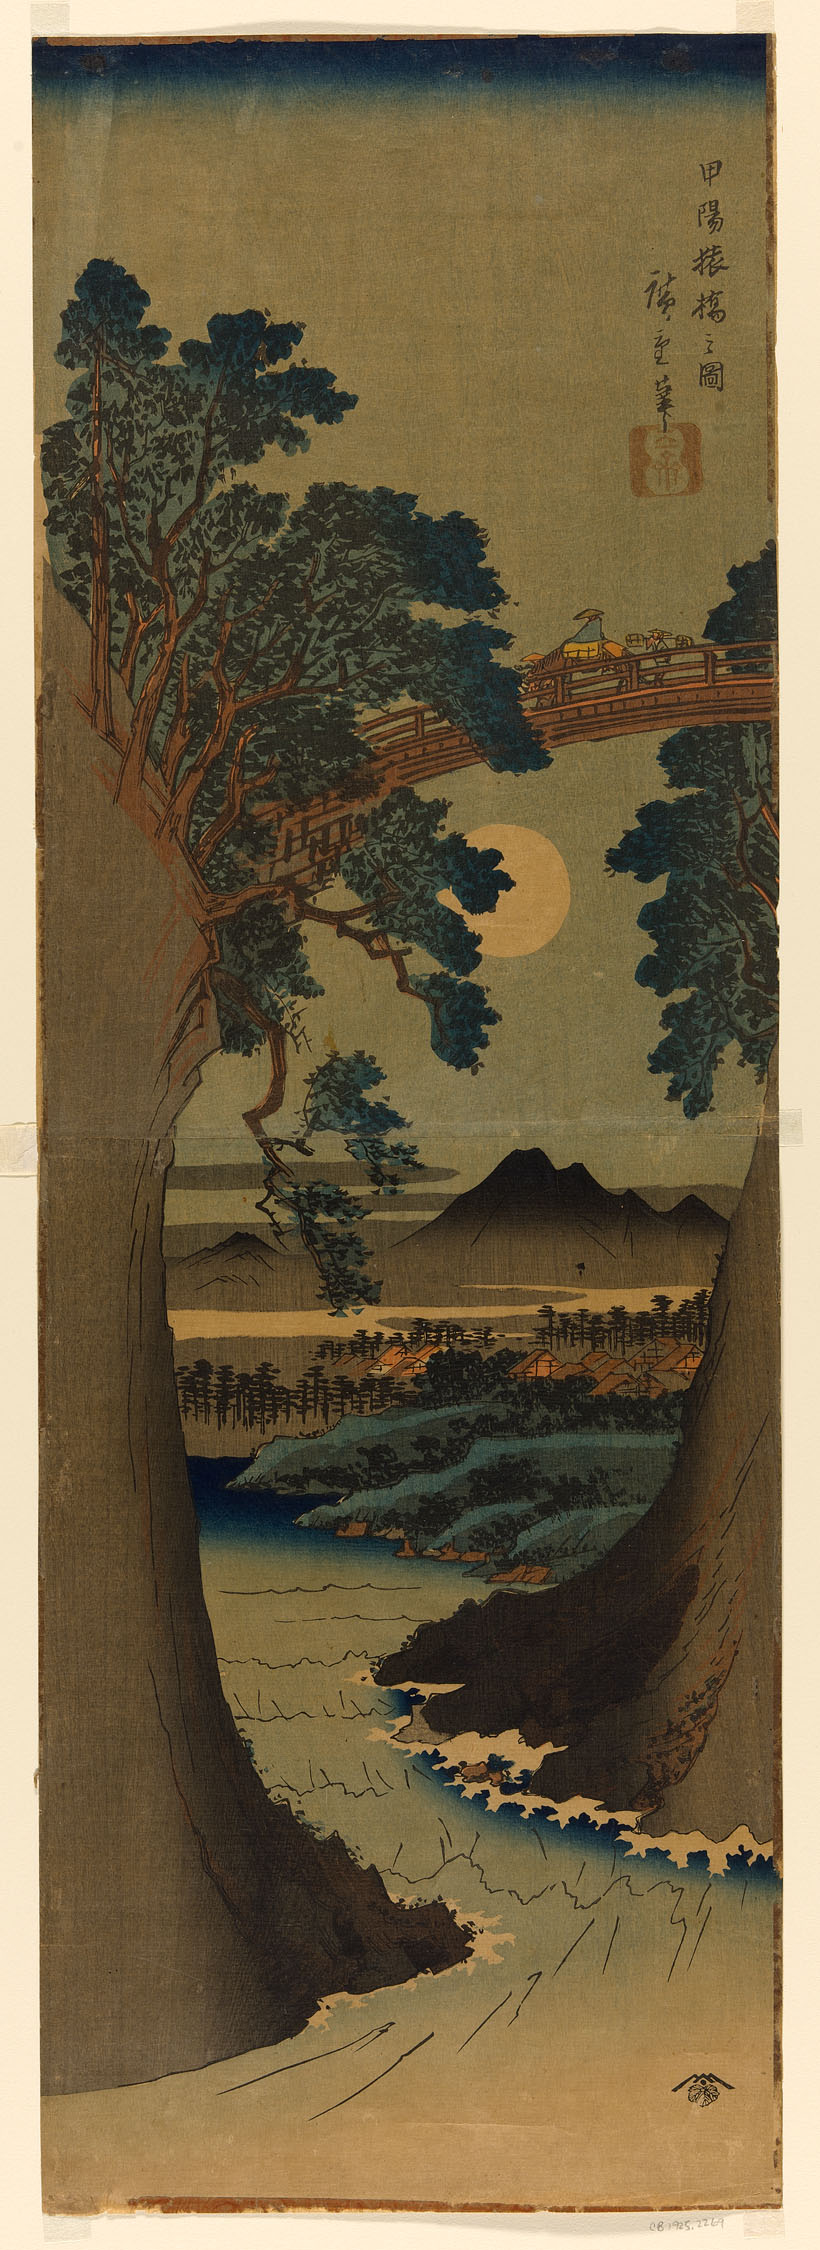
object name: Print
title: Monkey Bridge in Kai Province (Koyo Saruhashi no zu)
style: Japanese (culture or style)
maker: Utagawa Hiroshige 歌川 広重; Japanese, 1797-1858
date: c. 1841/42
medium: Color woodblock print; vertical oban diptych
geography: Japan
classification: woodblock print; print; asian art